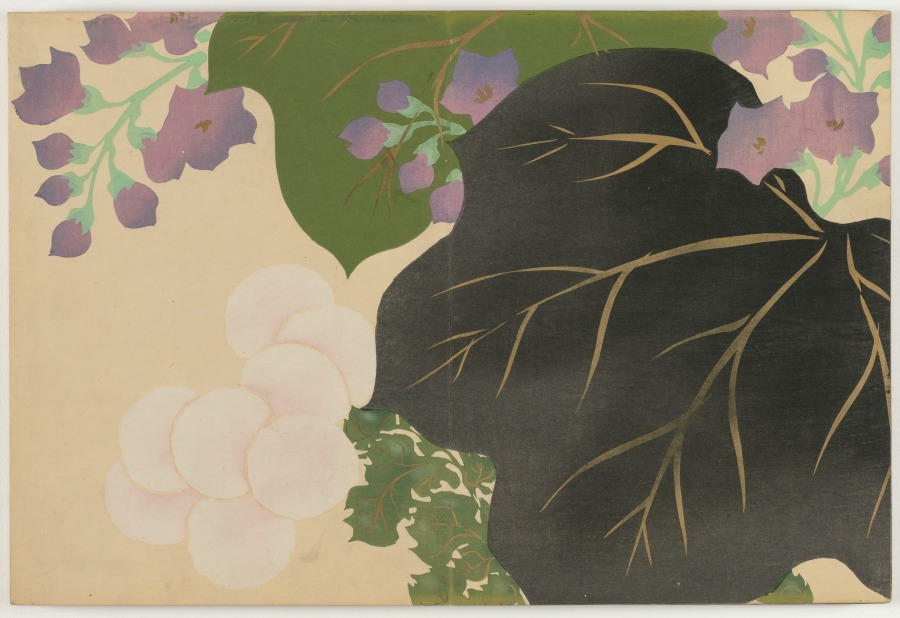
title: Flowers of a Hundred Worlds (Momoyogusa): Chrysanthemum and Paulownia (Kikukiri)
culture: Japan, Meiji period (1868–1912)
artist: Kamisaka Sekka (Japanese, 1866–1942)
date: 1909–10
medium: color woodcuts with gold and silver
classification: Bound Volume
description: This print from a set of three woodblock printed albums displays the graphic design prowess of Kamisaka Sekka. The images were first distributed one by one to subscribers to the series but later were reissued in bound form, like this book, for mass consumers. Each print features a vignette taken from nature or Japanese literature. Many of the scenes have a long history in Japan, originating in the 900s or 1000s and having been interpreted by all manner of artists since that time. Sekka’s selections hew closely to precedents from the Rinpa style originated by painter Tawaraya Sōtatsu (c. 1570–c. 1640) and calligrapher Hon’ami Kōetsu (1558–1637).